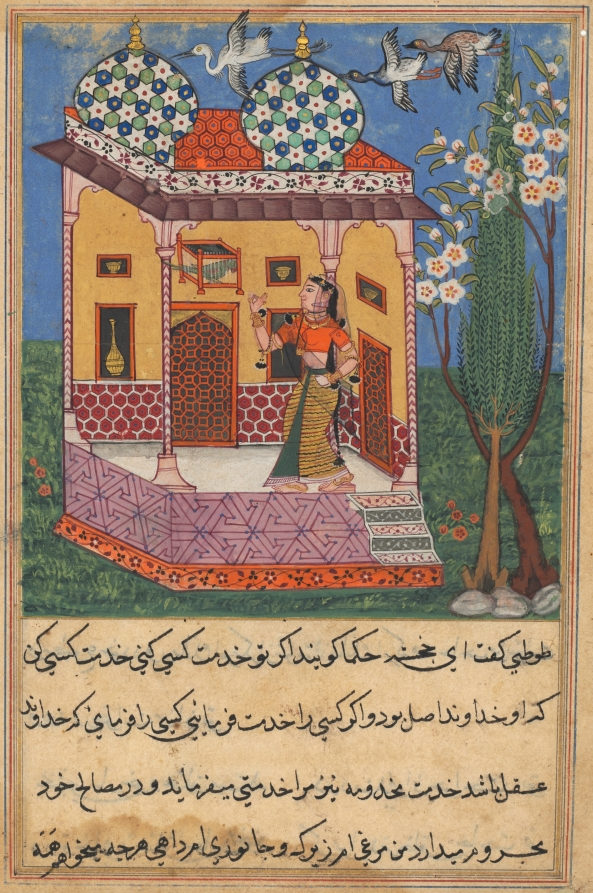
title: The Parrot Addresses Khujasta at the Beginning of the Twenty-sixth Night, from a Tuti-nama (Tales of a Parrot)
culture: Mughal India, court of Akbar (reigned 1556–1605)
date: c. 1560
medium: gum tempera, ink, and gold on paper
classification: Painting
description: When the sun, like a saffron-hued frog, plunged into the pond in the west and the moon, like a fish, came out of its snare in the east, Khujasta adorned with many kinds of jewels and bedecked with a variety of gold and silver ornaments went to Tuti to ask permission to leave. The parrot’s cage seems to hover in midair in the porch of a domed pavilion. The flowering treeentwining the cypress alludes to Khujasta’s desire to embrace her lover. As waterfowl course through the air, the parrot begins his story about the frog king Shapur.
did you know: The flowering tree entwining the cypress alludes to Khujasta’s desire to embrace her lover.